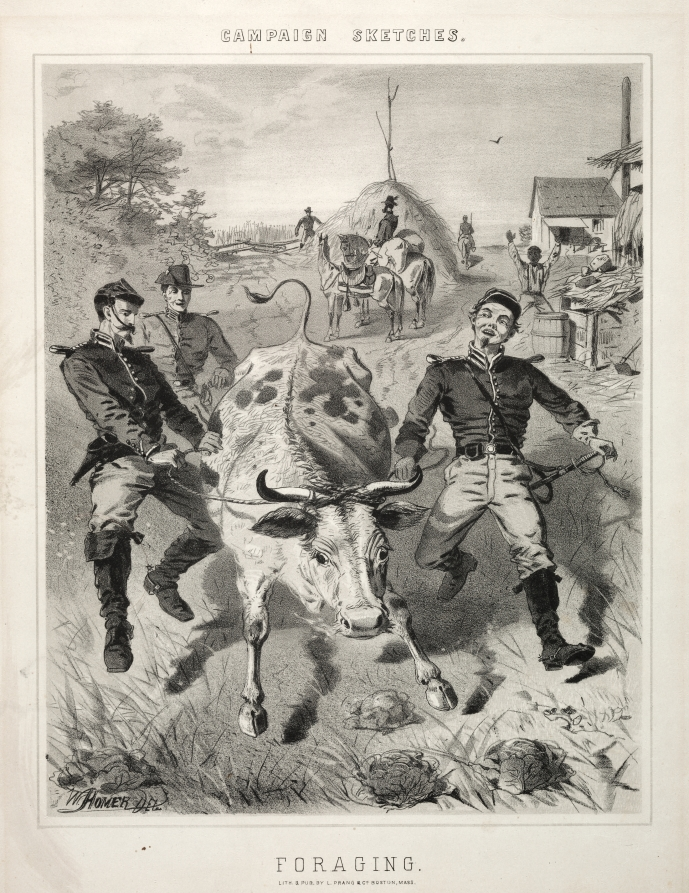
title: Campaign Sketches: Foraging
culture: America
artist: Winslow Homer (American, 1836–1910)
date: 1863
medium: lithograph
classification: Print